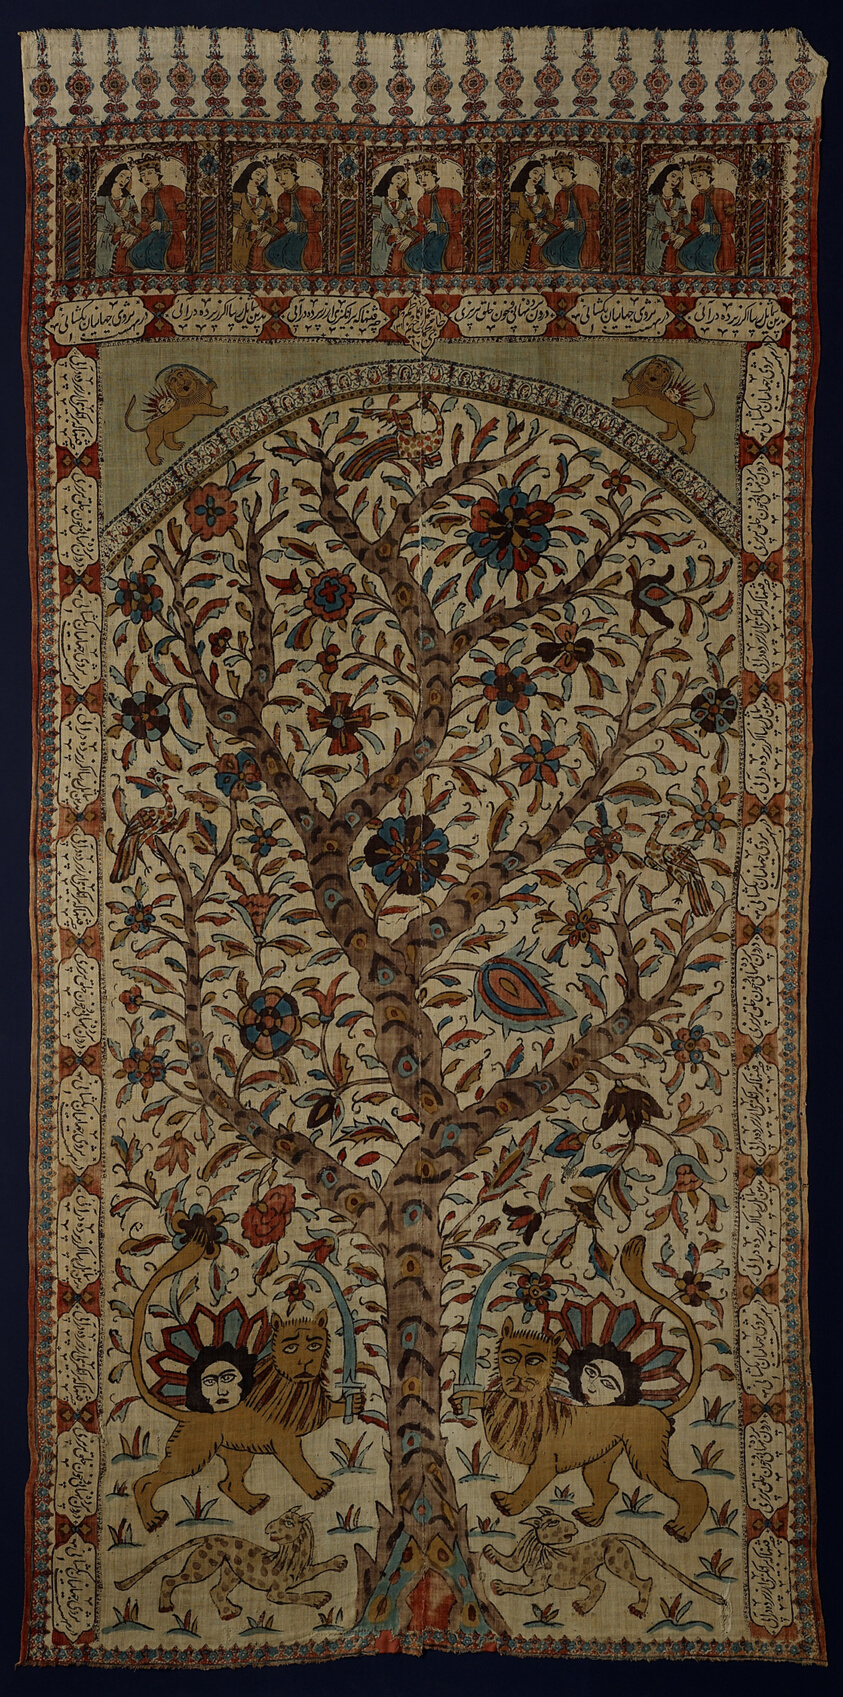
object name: Textile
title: Hanging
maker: Iran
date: 1893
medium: Linen, plain weave; painted; printed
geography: Iran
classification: weaving - printed; textile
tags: tree of life, lions, royal personages, suns, coat of arms, animals